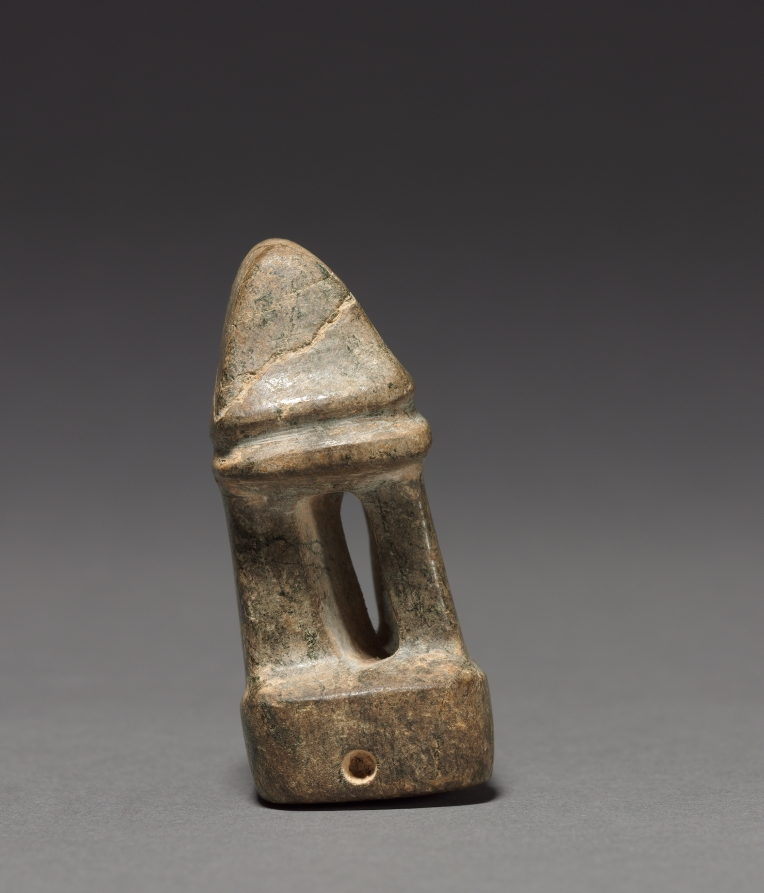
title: Architectural Model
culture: Mesoamerica, Mexico, Guerrero, Mezcala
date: 100 BCE–300 CE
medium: serpentine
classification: Sculpture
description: The Mezcala style takes its name from a river in its homeland, the Guerrero region of western Mexico. The style is known for small-scale stone sculptures including architectural “models” characterized by sleek abstraction. Because comparisons to actual architecture in the Mezcala region are scarce, it is not known whether the models refer to temples, houses, or underground funerary structures.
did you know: The Mezcala style is only identified in stone sculpture.